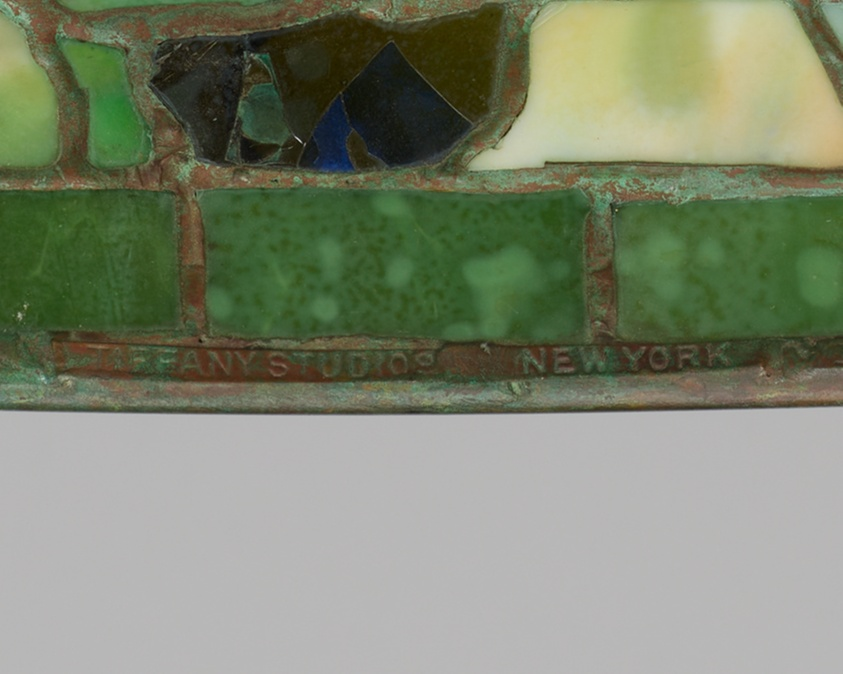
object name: Furnishings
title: Lamp with “Nasturtium” Shade and “Bamboo” Base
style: Arts and Crafts Movement, 20th Century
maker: Design attributed to Clara Pierce Wolcott Driscoll (American, 1861–1944); Tiffany Studios (American, 1902–32); Corona, New York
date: c. 1910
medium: Favrile glass and bronze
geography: Corona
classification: lamp (lighting device); american decorative arts; decorative arts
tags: Nasturtium, bamboo